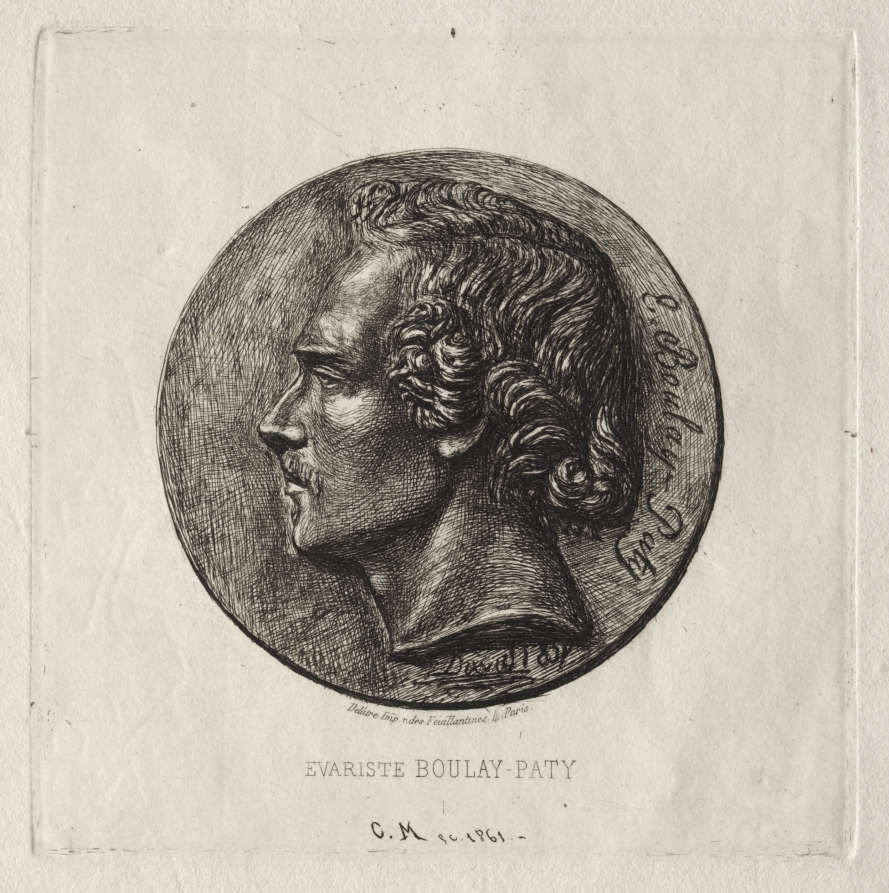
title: Evariste Boulay-Paty; a Poet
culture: France, 19th century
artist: Charles Meryon (French, 1821–1868)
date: 1861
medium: etching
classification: Print